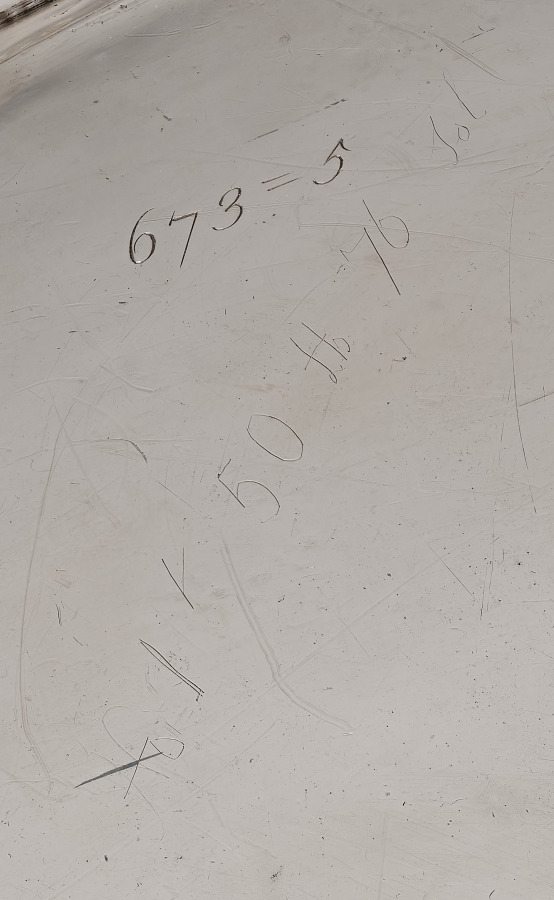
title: Stand for a Covered Tureen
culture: France, Paris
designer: Juste-Aurèle Meissonnier (French, 1695–1750)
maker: Pierre-François Bonnestrenne (French)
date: 1735–38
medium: silver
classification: Silver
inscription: engraved Meissonnier signature.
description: See entry for cover record 1977.182.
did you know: The langoustine, pigeon, and vegetables were cast using real examples giving the silver copies lifelike detail and appearance.